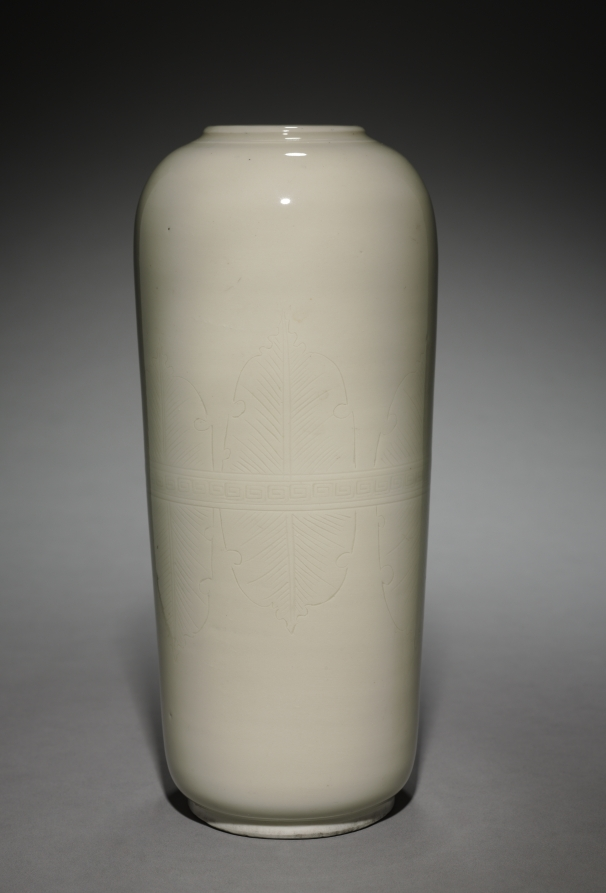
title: Vase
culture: China, Qing dynasty (1644-1911)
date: 1644–1911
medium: porcelain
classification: Ceramic